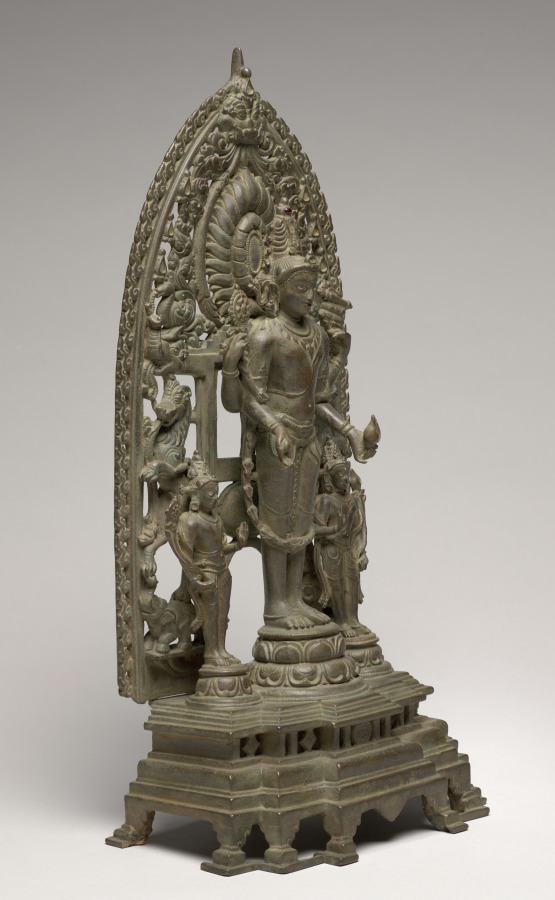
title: Vishnu Attended by Chakrapurusa and Shankhapurusa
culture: East India, Bengal, Pala period, 11th-12th century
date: 1000s–1100s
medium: bronze with silver inlay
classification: Sculpture